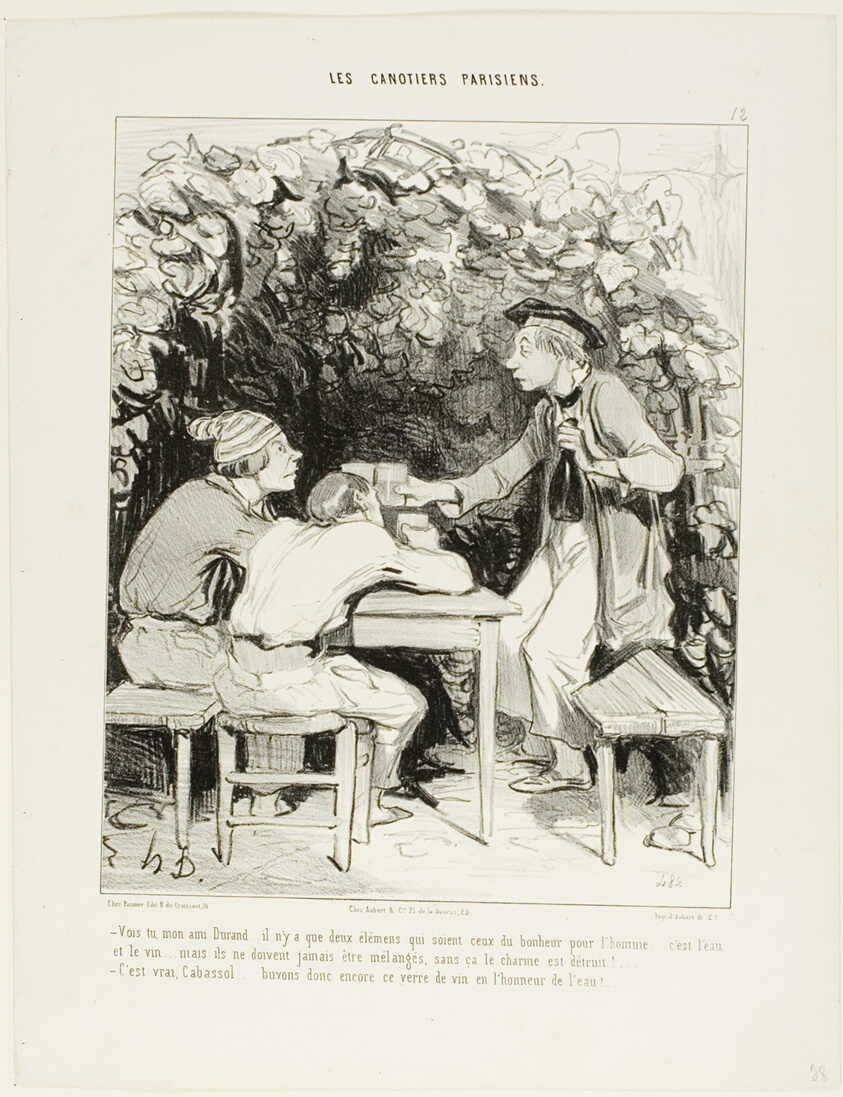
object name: Print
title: “- You see, my friend Durand.... there are only two important components of happiness for a man: water and wine... but they must never be mixed, otherwise they lose their charm. - Quite right, Cabassol.... let's drink another glass of wine in honour of water!,” plate 12 from Les Canotiers Parisiens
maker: Honoré Victorin Daumier; French, 1808-1879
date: 1843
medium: Lithograph in black on white wove paper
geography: France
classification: lithograph; print; prints and drawing